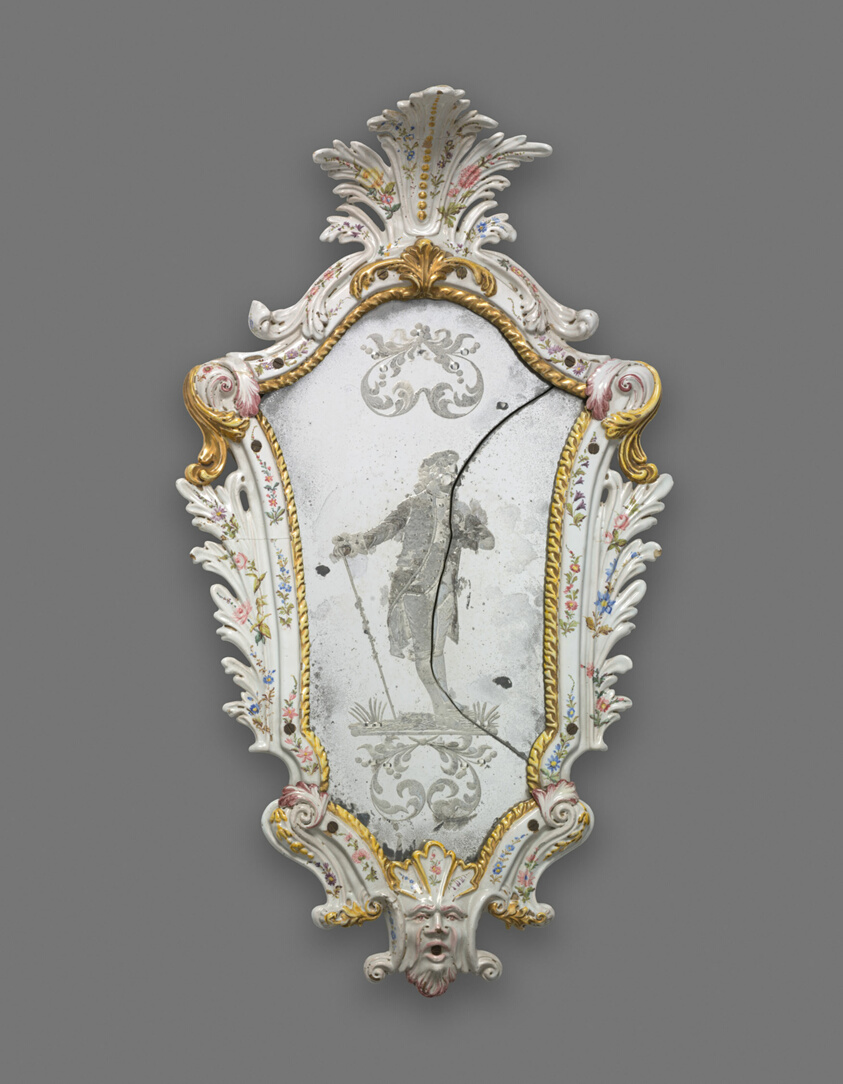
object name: Ceramics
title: Mirror: Courtier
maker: Italy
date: 1740/60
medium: Tin-glazed earthenware (faience) and mirror glass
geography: Italy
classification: earthenware; mirror; furniture; ceramics; european decorative arts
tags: furniture